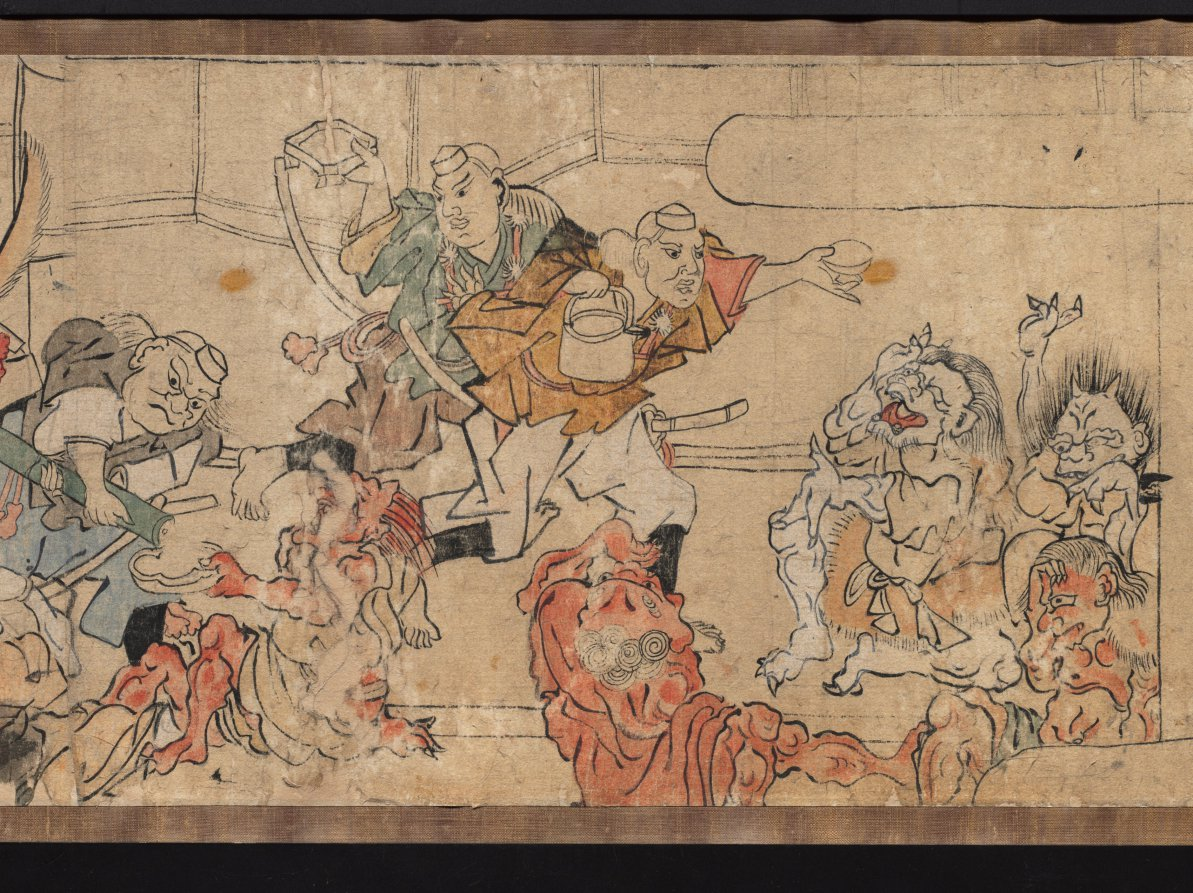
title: Oeyama Engi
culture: Japan, Edo period (1615–1868)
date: 1615–1868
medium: one of a pair of handscrolls; ink and color on paper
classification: Painting